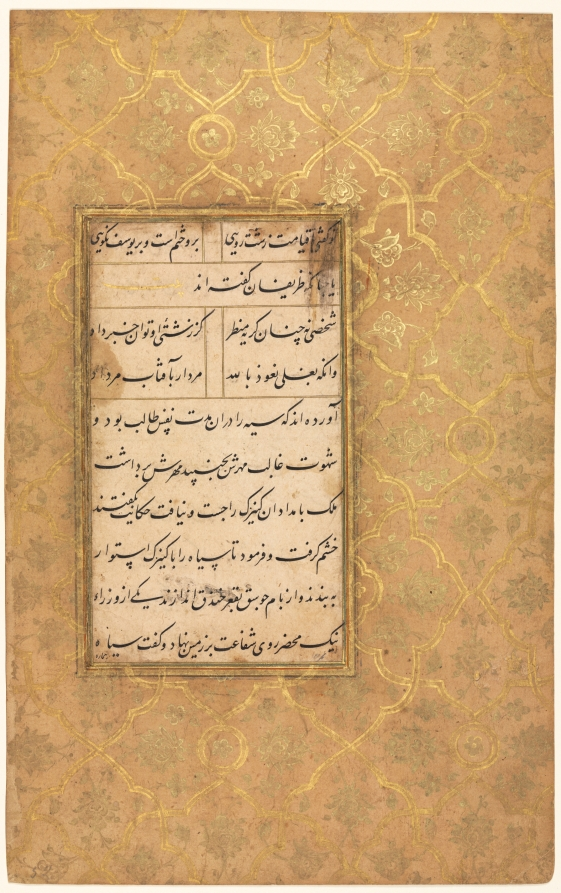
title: Illuminated folio (verso) from a Gulistan (Rose Garden) of Sa'di (c. 1213–1291)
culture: Iran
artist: Sultan 'Ali al-Mashadi (Iranian, 1430–1520)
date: calligraphy: c. 1475–1500; border: c. 1550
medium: Gum tempera, ink, gold, and silver on paper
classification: Manuscript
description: The border scene is set in a magical forest bursting with blossoms. At the top, a winged lion chases a winged deer, who is caught in the bottom border. The imagery of a lion biting down on its prey dates from the Achaemenid period in Iran (550–330 BCE) and references the valor of the king. A fox scurries off to the right. The verse is written in the Persian language using nastaliq script. Sultan ‘Ali Mashadi was widely renowned for perfecting the nastaliq script, and his calligraphy was a model for many followers across the Islamic world.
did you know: Meaning “rose bush” in Persian, the Gulistan is a collection of anecdotes in both verse and prose.